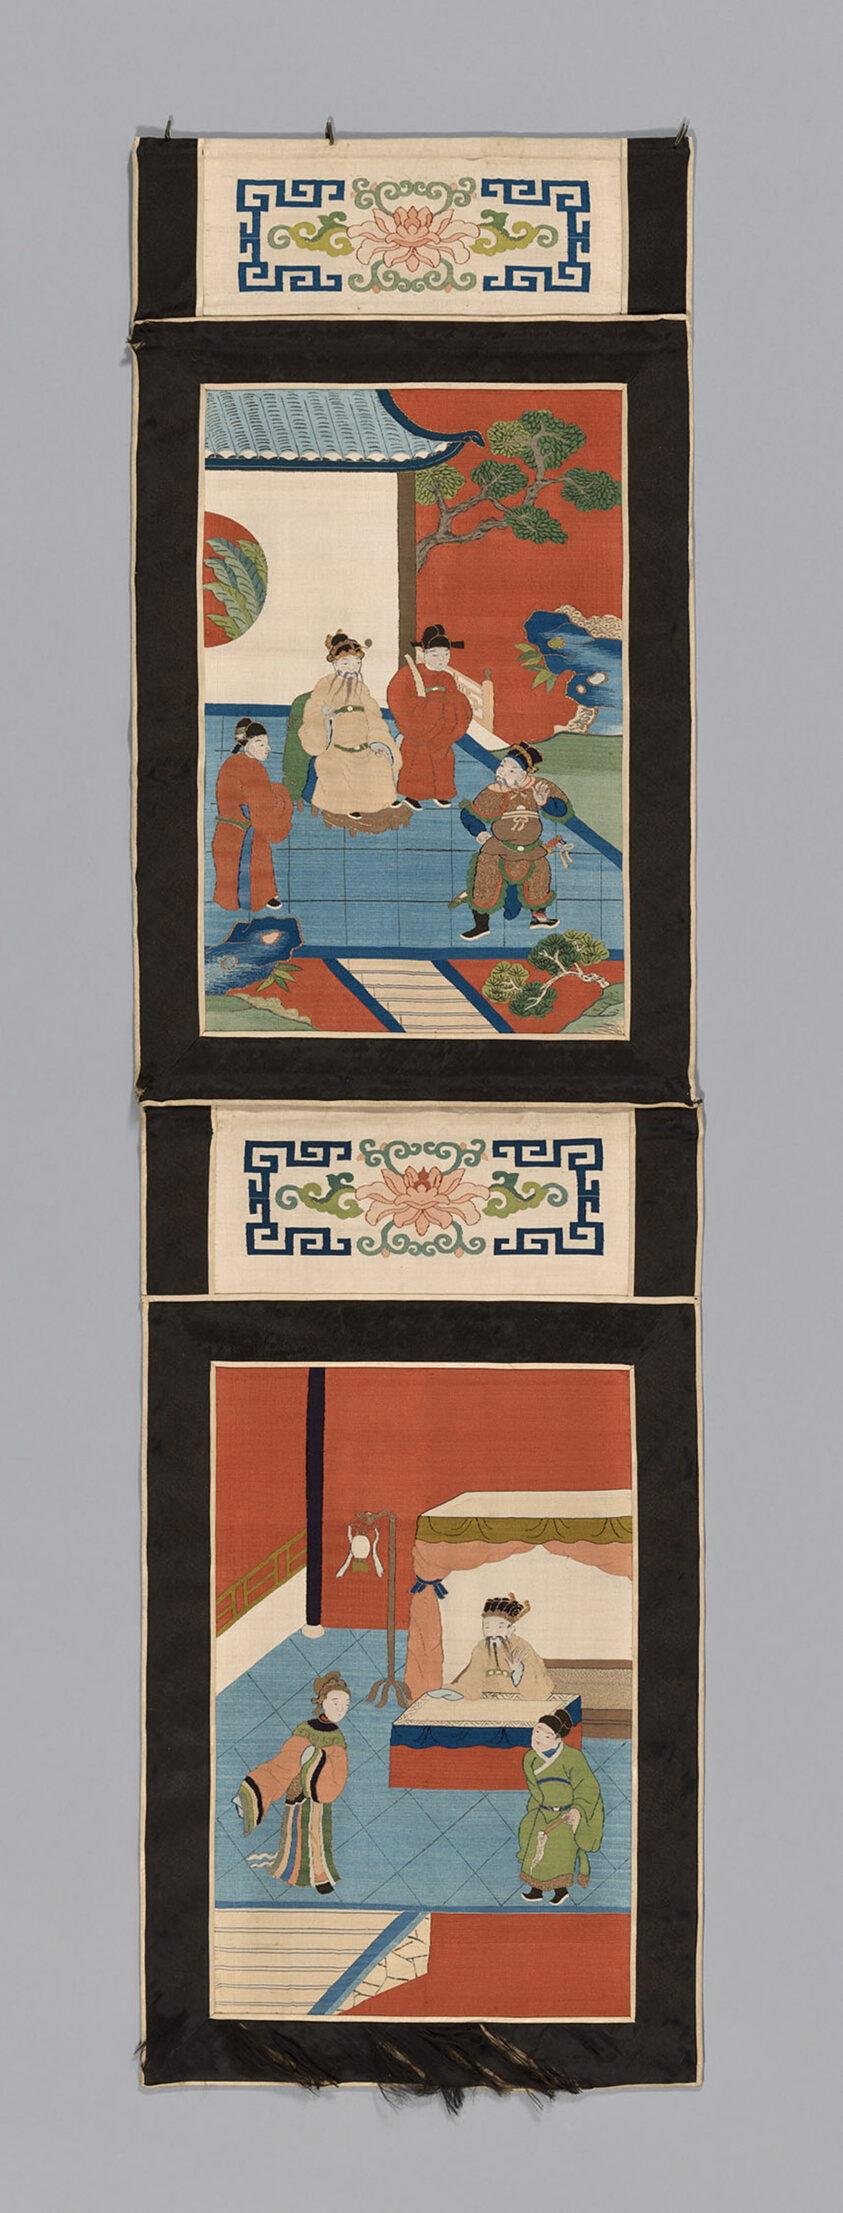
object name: Textile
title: Panel (For a Screen)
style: qing, asian, Chinese (culture or style), East Asian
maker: China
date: Qing dynasty (1644–1911), 1875/1900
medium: Panels: Silk, gold-leaf-over-lacquered-paper-wrapped silk, slit tapestry weave with extended weft and interlaced outlining wefts; painted; borders: silk and cotton, warp-float faced 5:1 satin weave; inner and outer edges: silk, warp-float faced 4:1 satin weave; lining: cotton, plain weave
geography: China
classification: weaving - tapestry; weaving; textile